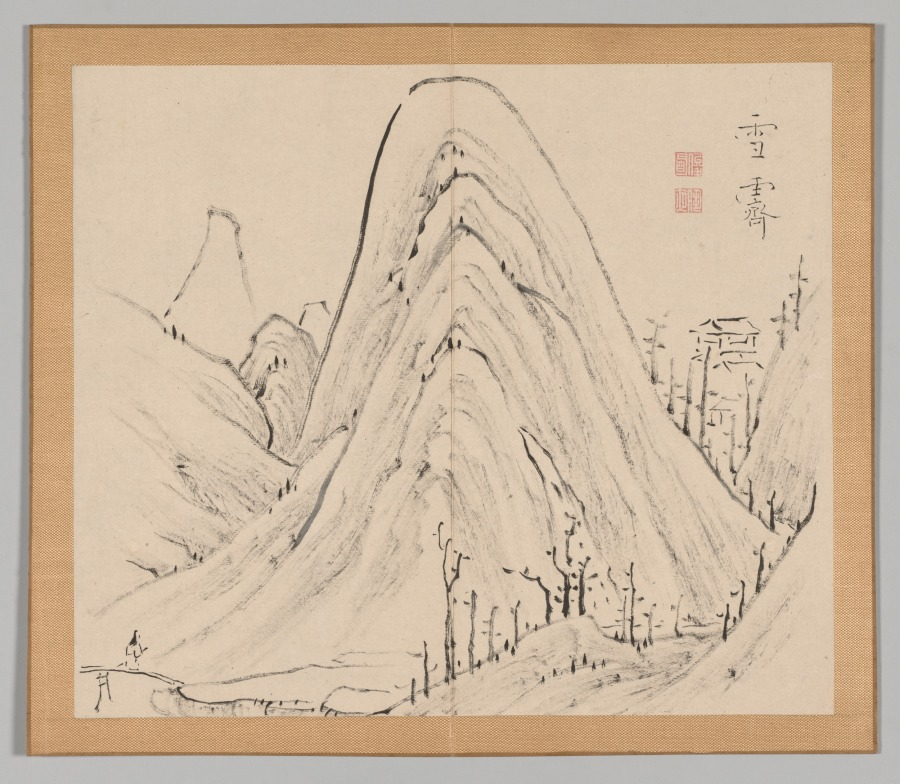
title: Reverberations of Taiga, Volume 1 (leaf 33)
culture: Japan, Edo period (1615–1868)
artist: Aoki Shukuya (Japanese, d. 1802)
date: mid- to late 1700s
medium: double-leaf from a pair of albums; ink and light color on paper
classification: Portfolio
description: Traditionally, young painters in Japan began their studies with an established master-painter. The master's compositions invariably became models that the apprentice copied to learn various ink and brush techniques. Shukuya was a pupil of the famous Kyoto artist Ikeno Taiga, whose style is reflected in these sketches of rocks, trees, and mountains.